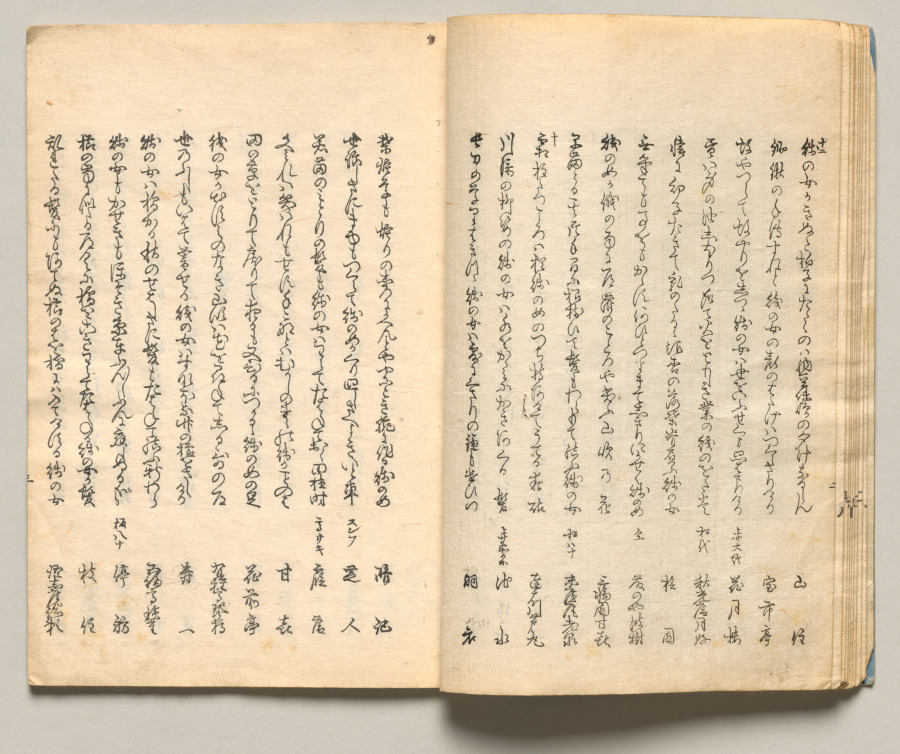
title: Spread Ten from Volume Three of People of Japan in Light Verse (Kyōka)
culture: Japan, Edo period (1615–1868)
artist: Utagawa Hiroshige (Japanese, 1797–1858)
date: 1857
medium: Woodblock-printed book; ink and color on paper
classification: Bound Volume